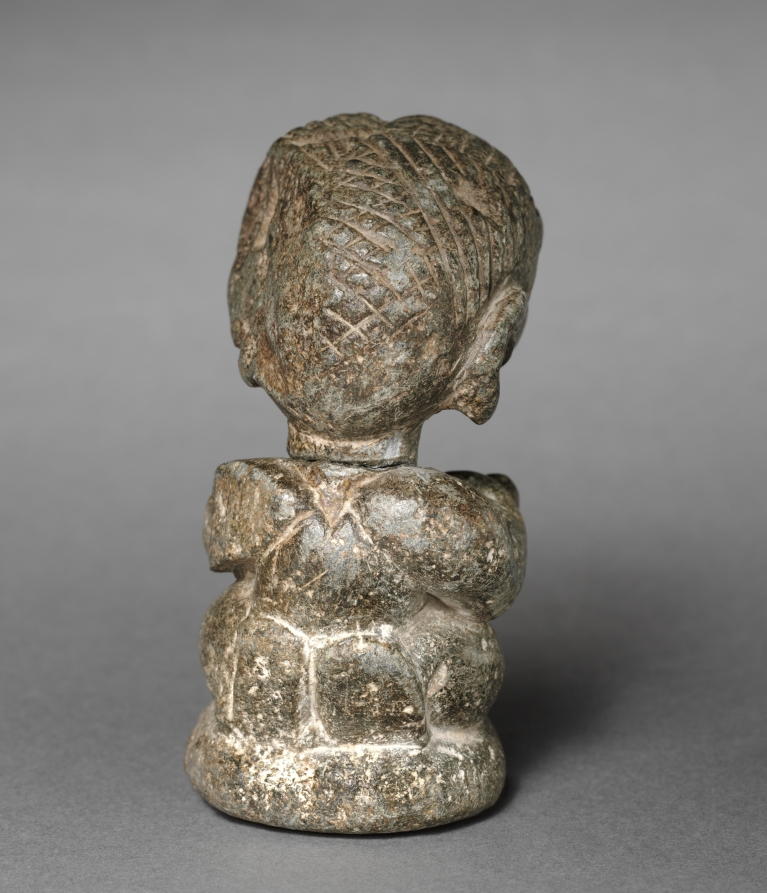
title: Female Figure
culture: Africa, West Africa, Sierra Leone, Sherbro-style maker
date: 1500s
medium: soapstone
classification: Sculpture